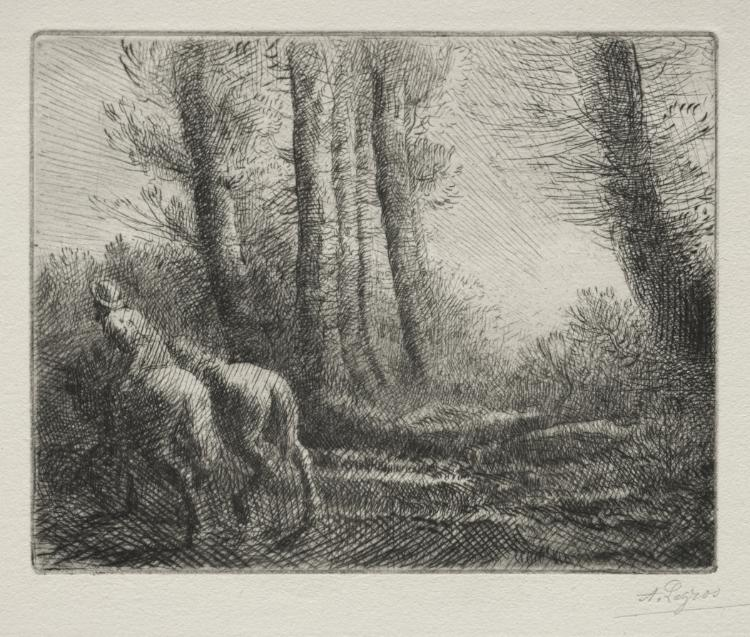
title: Returning from Tilling the Land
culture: France, 19th century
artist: Alphonse Legros (French, 1837–1911)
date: c. 1857–1911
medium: drypoint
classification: Print